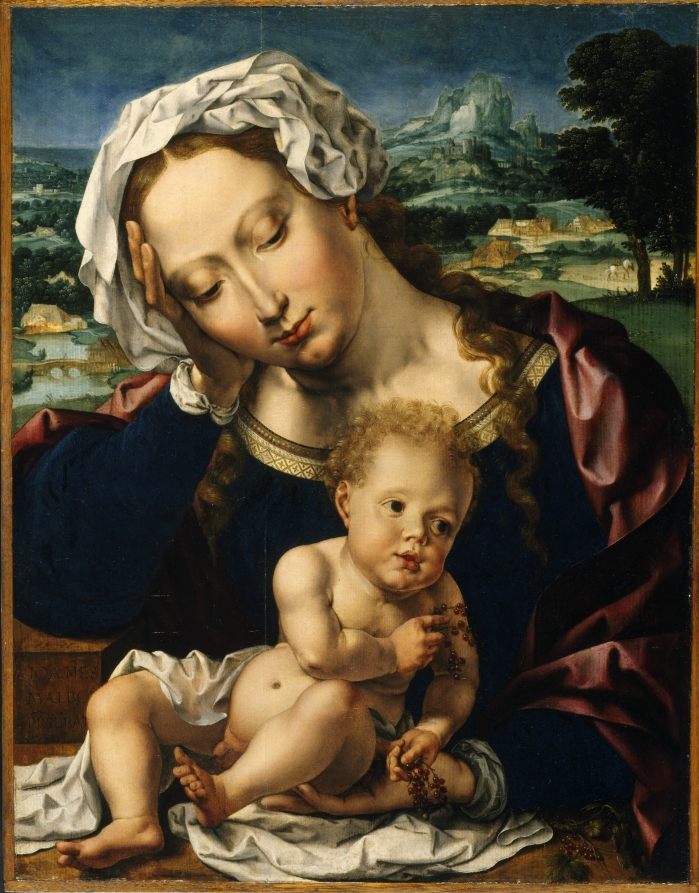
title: Virgin and Child in a Landscape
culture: Flanders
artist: Jan Gossaert (Flemish, c. 1475/78–1532)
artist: and an Anonymous Landscape Painter (Flemish)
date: 1531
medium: oil on wood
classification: Painting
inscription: Signed lower left: "1531 / JOANES / MALBO [...] / PÏGEBAT"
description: Among the first northern European artists to study in Rome, Gossaert returned north to serve in various German and Flemish courts, incorporating Italian Renaissance ideas. Gossaert also painted the frame, including the Latin inscription: "Mother, may your contemplation be our reconciliation." The patron is likely Mencía de Mendoza, a Spanish noblewoman, one of the most important art collectors and intellectuals of the early 1500s.